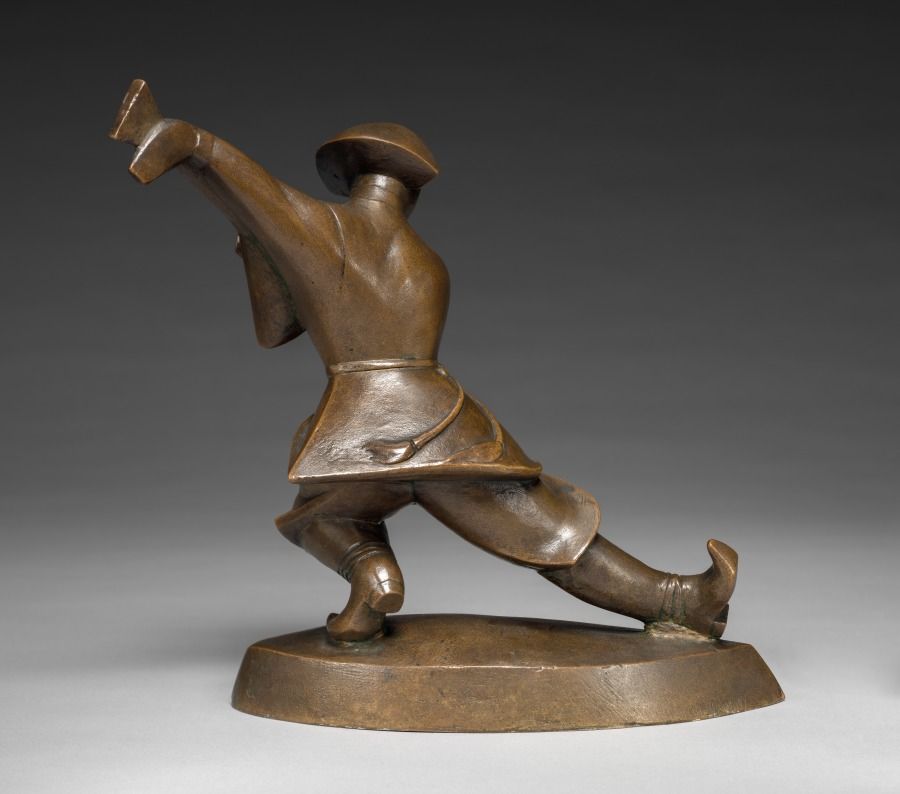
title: Balalaika Player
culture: America, Ohio, Cleveland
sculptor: Alexander Blazys (American, born Russian Empire [now Lithuania], 1894–1963)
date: 1925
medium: bronze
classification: Sculpture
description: A Lithuanian immigrant, Blazys introduced modernist sculpture to Cleveland upon his arrival in 1925. These figures merge rhythmic movement inspired by music with faceted, geometric planes derived from Cubism.